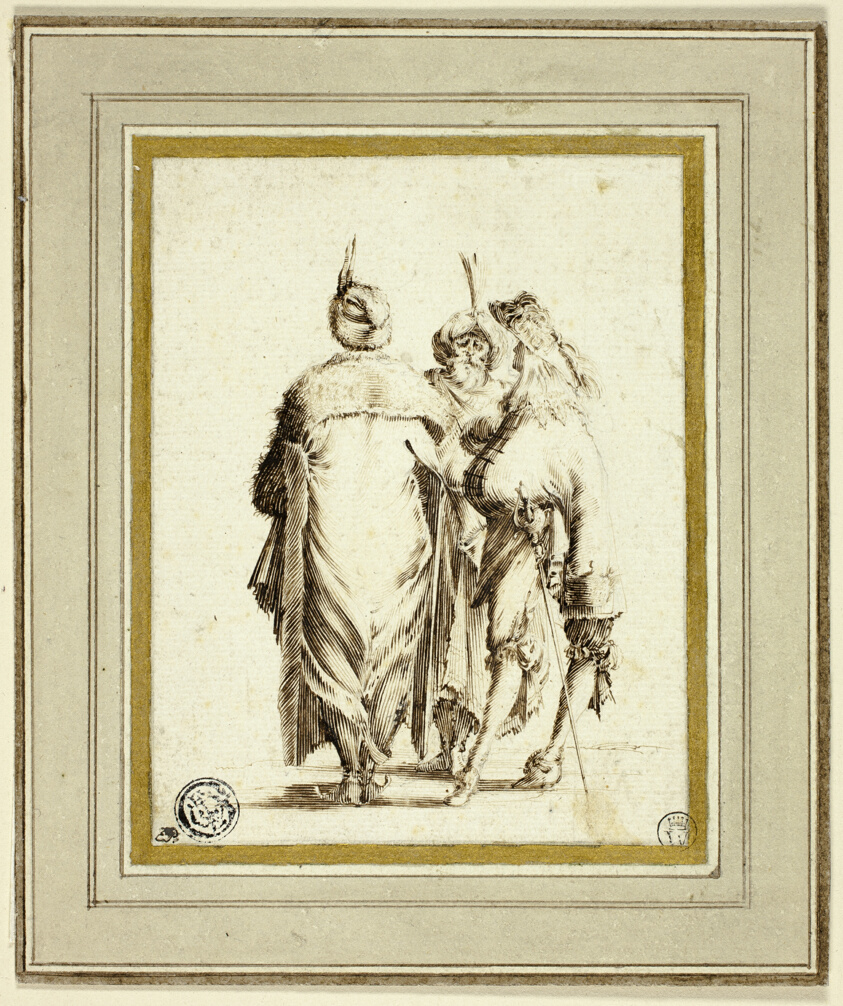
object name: Drawing and Watercolor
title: European Courtier and Two Turks, Conversing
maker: Style of Stefano della Bella; Italian, 1610-1664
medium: Pen and brown ink, with traces of black chalk, on ivory laid paper, laid down on ivory laid paper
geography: Italy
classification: pen and ink drawings; drawings (visual works); prints and drawing